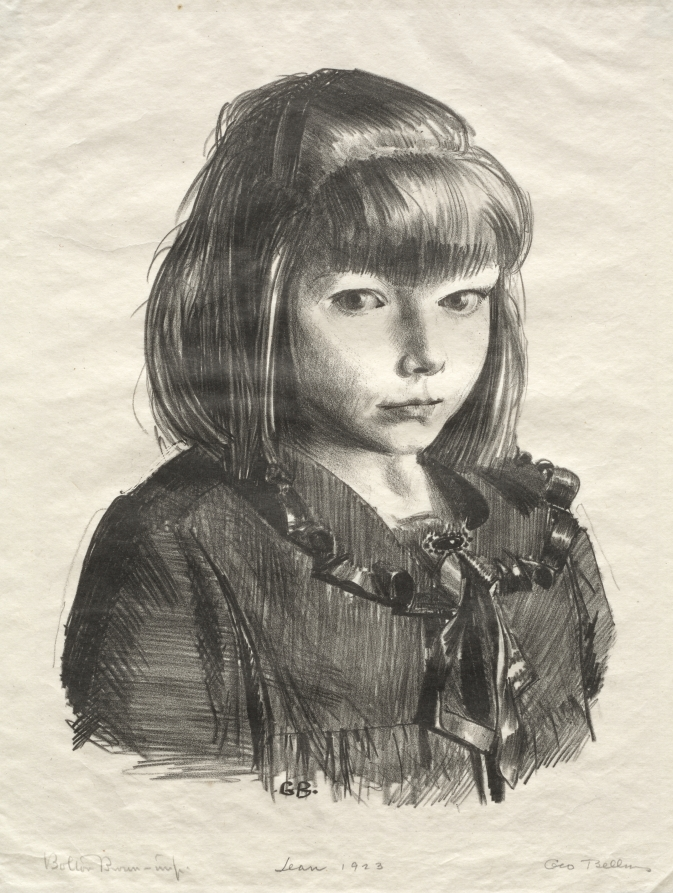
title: Jean 1923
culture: America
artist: George Bellows (American, 1882–1925)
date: 1923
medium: lithograph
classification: Print